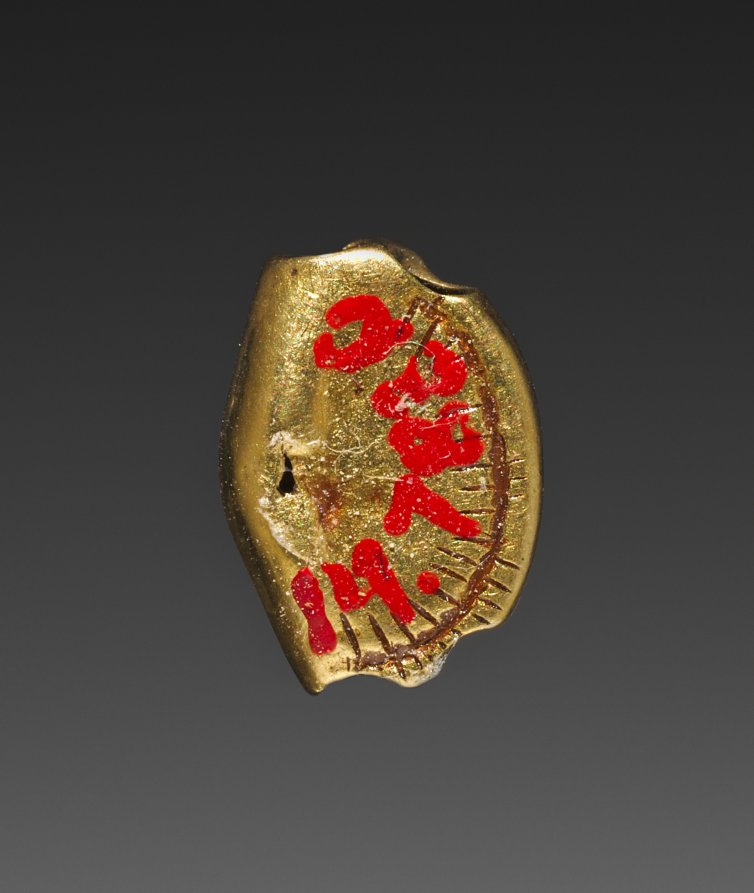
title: Wallet Bead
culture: Egypt, New Kingdom (1540–1069 BCE), Dynasty 18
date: 1540–1296 BCE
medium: gold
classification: Jewelry